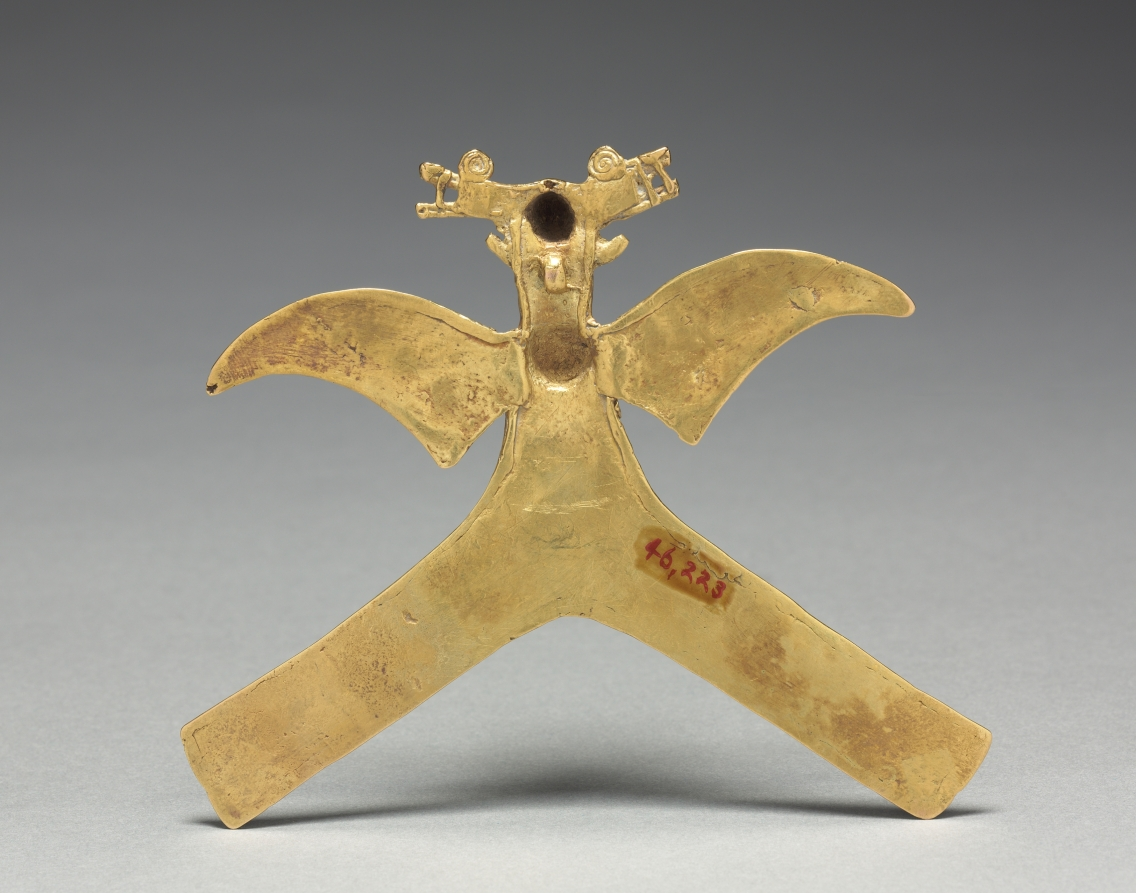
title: Bird Pendant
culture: Costa Rica, Diquís region, or Panama, 11th-16th century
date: c. 1000–1550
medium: cast gold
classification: Metalwork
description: Among the pendants shown here are a crustacean (1943.290), an animal-headed figure (1948.18), and two pendants featuring birds (1951.442 and 1946.223). The latter were dubbed aguilas (eagles) by Christopher Columbus, who saw natives wearing them as necklace ornaments. Modern researchers are not as sure of the species shown, but some believe that they are birds of prey because talons and beaks are prominent and often clutch something, in one example here a small, disembodied head that holds a clapper. In both examples, two tufts in the form of crocodiles in profile flank the birds’ heads.